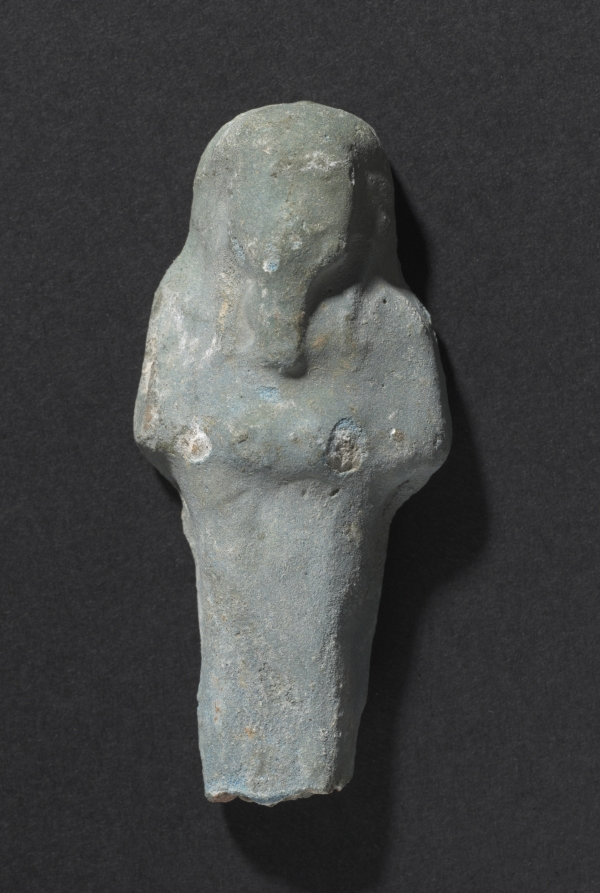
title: Shawabty of Ditamenpaankh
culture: Egypt, Late period (715–332 BCE), Dynasty 25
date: 715–656 BCE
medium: terracotta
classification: Funerary Equipment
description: High demand for shawabtys in the Late Period, a time when as many as 400 or more shawabtys were placed in the tomb with the deceased, gave rise to a specialized container for storing them: the shawabty box. This example is inscribed for the lady of the house, Ditamenpaankh, and was probably one of a pair originally made for her. The single-masted boat on the box's lid is perhaps an allusion to the pilgrimage of the deceased to the holy city of Abydos, the cult city of Osiris, king of the dead. The shawabtys inside are crude, mass-produced examples cast in an open mold. Made of terracotta, their blue paint imitates more costly shawabtys made of faience. As for the shawabty spell, it has been removed from its traditional location on the shawabty's front and relocated onto the sides of box, where it needed only to be written once, thus expediting production.